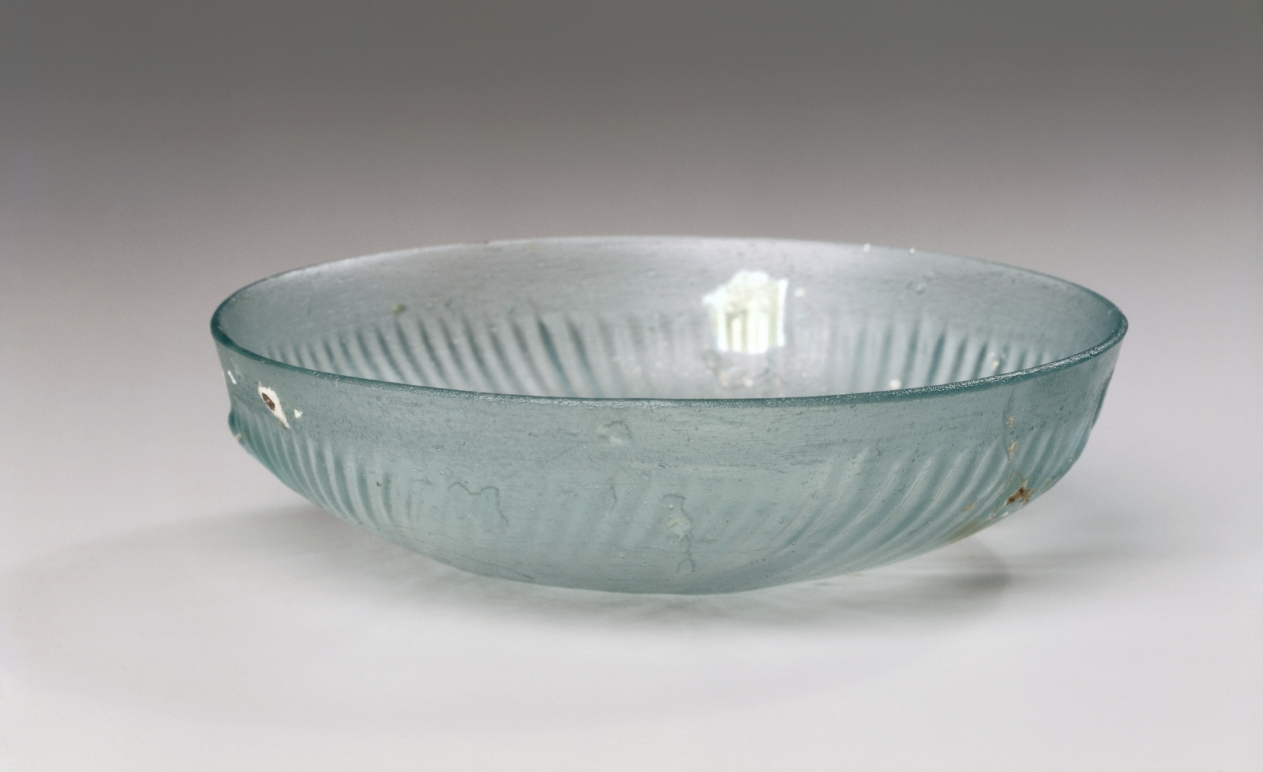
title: Shallow Ribbed Bowl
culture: Roman, Eastern Mediterranean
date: 50 BCE–100 CE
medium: glass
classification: Glass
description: Shallow ribbed glass bowls, often light blue, green, or turquoise in color, are a fairly common ancient glass vessel type. They were likely made by blowing or pressing molten glass into molds, sometimes leaving visible air bubbles within the glass matrix. After cooling, an artisan would rotate the bowl on a wheel or lathe, using a gentle abrasive to smooth out imperfections.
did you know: The Roman shallow ribbed bowl, with central boss, recalls the earlier Greek phiale (libation dish).